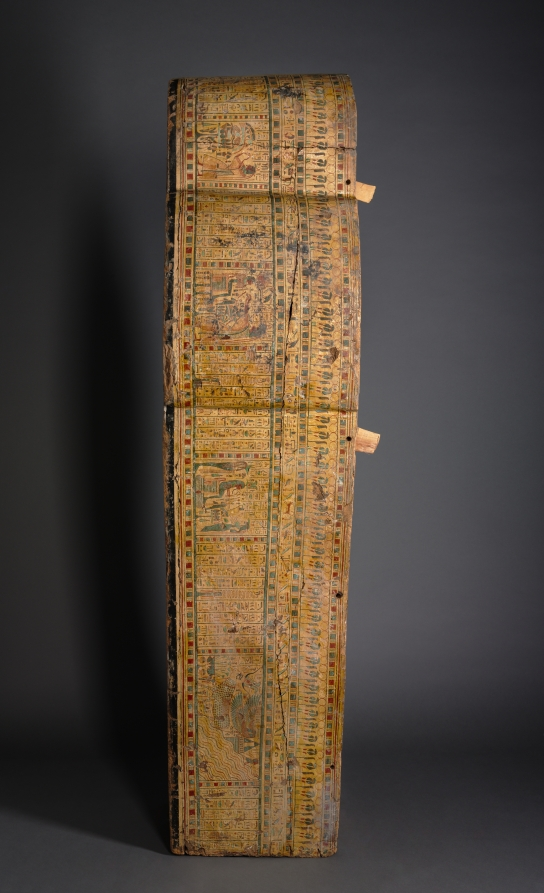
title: Coffin of Nesykhonsu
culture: Egypt, Thebes, Third Intermediate (1069–715 BCE), Dynasties 21–22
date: c. 976–889 BCE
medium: gessoed and painted sycamore fig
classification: Funerary Equipment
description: Egyptian coffins told stories and illustrated spells to help the deceased transition safely to the afterlife. Inside Nesykhonsu's coffin there are two jackals, one facing right and the other left, near the top. Here, the jackal represents the powerful deity Anubis, the god of the afterlife and embalming.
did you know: Two of Nesykhonsu's titles, "Lady of the House" and "Singer of the Choir of Mut the Great," are written on the outside of the coffin.